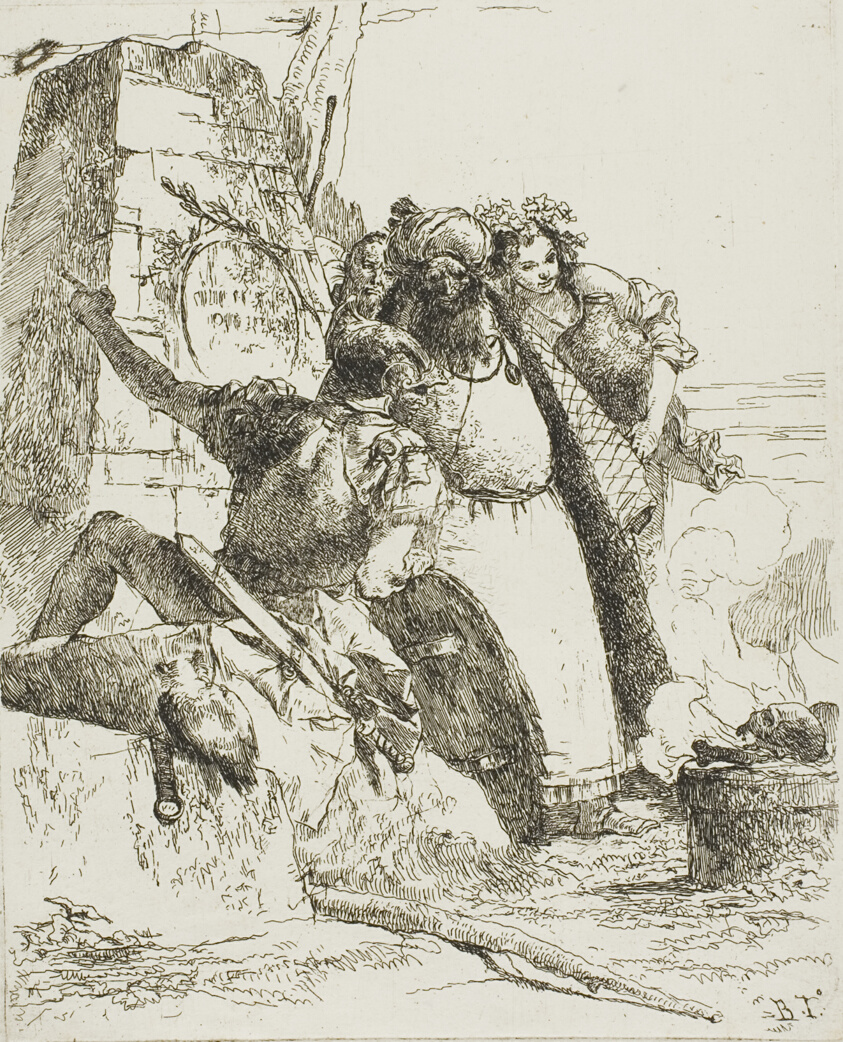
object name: Print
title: A Magician, A Soldier, and Three Figures Watching a Burning Skull, from Scherzi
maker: Giovanni Battista Tiepolo (Italian, 1696–1770)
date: 1735–40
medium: Etching printed in black on paper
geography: Italy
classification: etching; print; prints and drawing